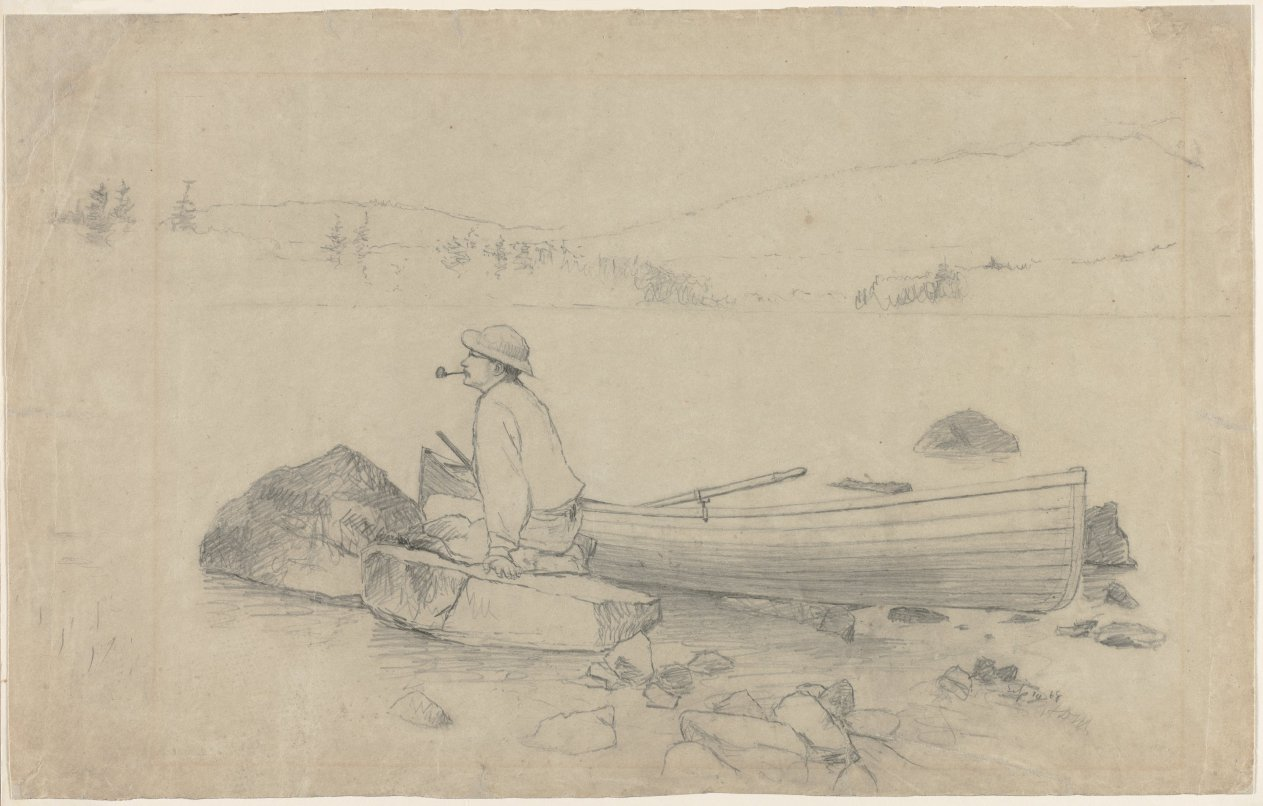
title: Adirondacks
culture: America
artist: Homer Dodge Martin (American, 1836–1897)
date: 1868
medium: pencil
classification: Drawing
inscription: Dated, September 10, 68 (1868)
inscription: Initialed in graphite: "H.D.M."